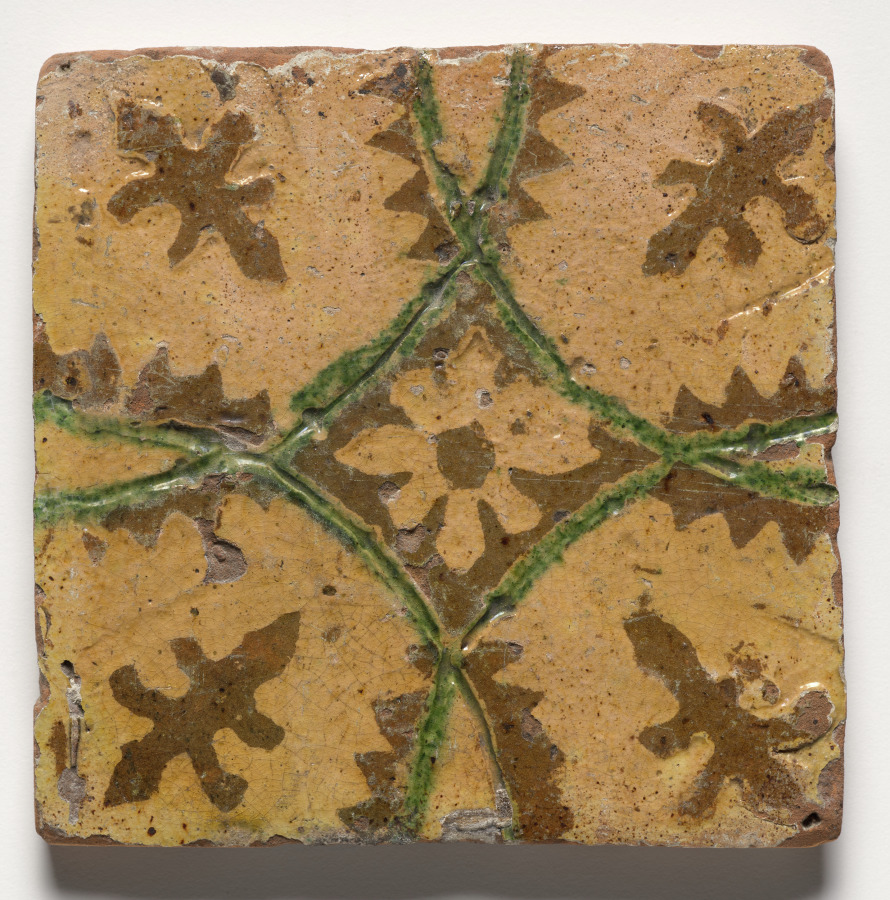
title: Tile- Diamond Medallion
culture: Netherlands, Holland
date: c. 1600s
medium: glazed ceramic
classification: Ceramic